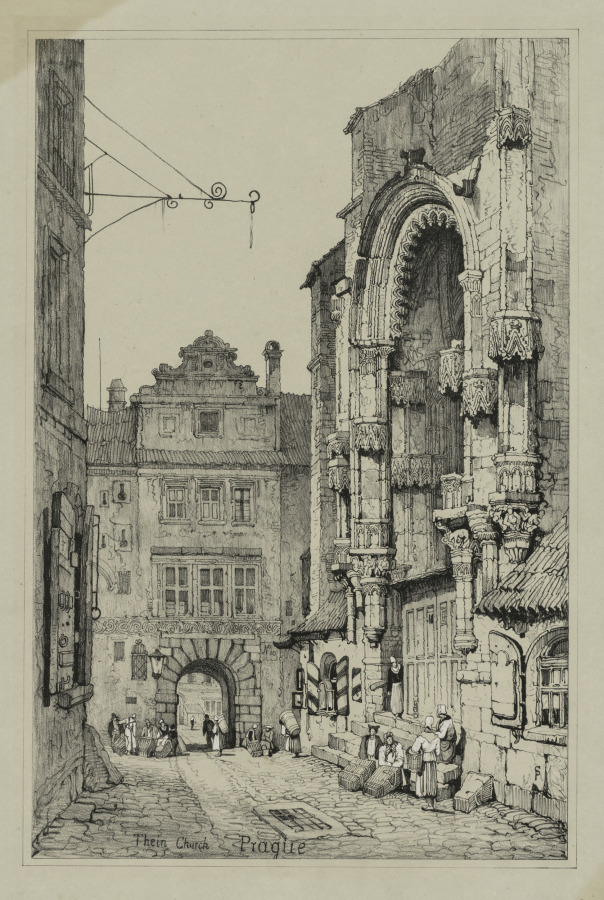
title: Facisimilies of Sketches made in Flanders and Germany: Thein Church, Prague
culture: England, 19th century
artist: Samuel Prout (British, 1783–1852)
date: 1833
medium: lithograph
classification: Print